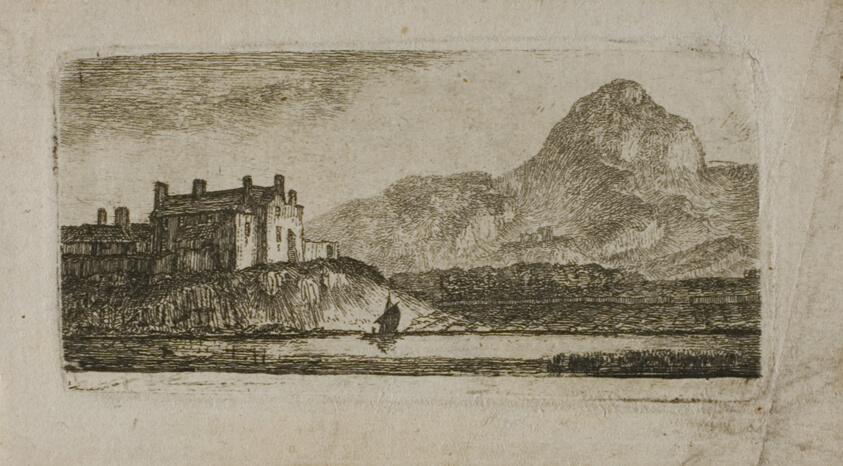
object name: Print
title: Arthur's Seat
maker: John Clerk of Eldin (Scottish, 1728-1812)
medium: Etching on paper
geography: Scotland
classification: etching; print; prints and drawing